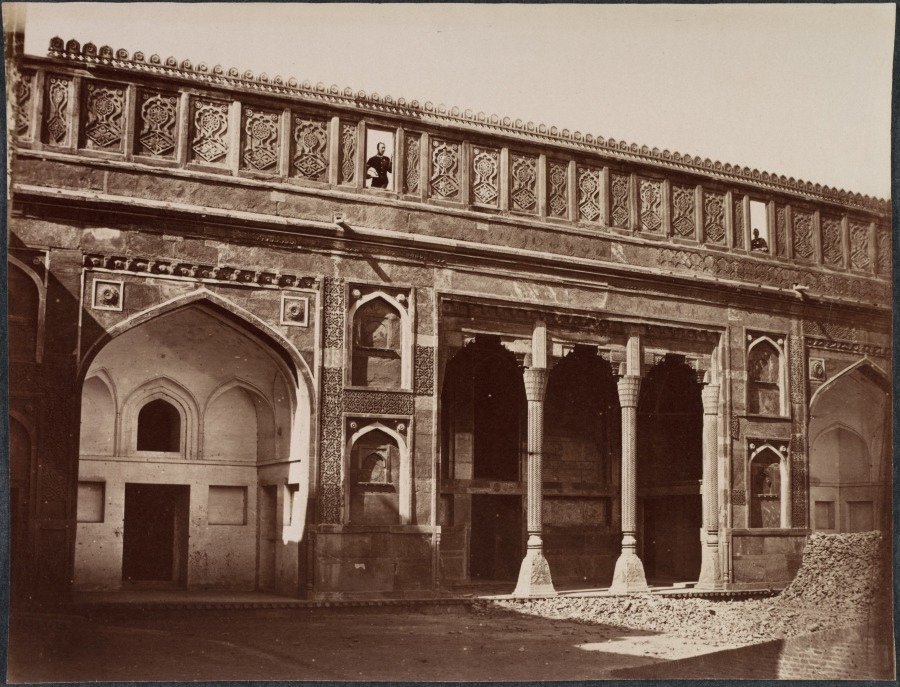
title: Untitled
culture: 19th century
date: c. 1879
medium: Albumen print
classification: Photograph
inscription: Written in pencil on verso: "no 19" Written in pencil on verso: "Fort Agra Jahangir Mahal" Imprinted in black type on adhesive label on polyethelene sleeve: "Asie: Anonyme (BB154)/Inde. Le port pres du Taj./Tirage albumin d'epoque. Circa 1879. 21/x27 cm./320.00€"